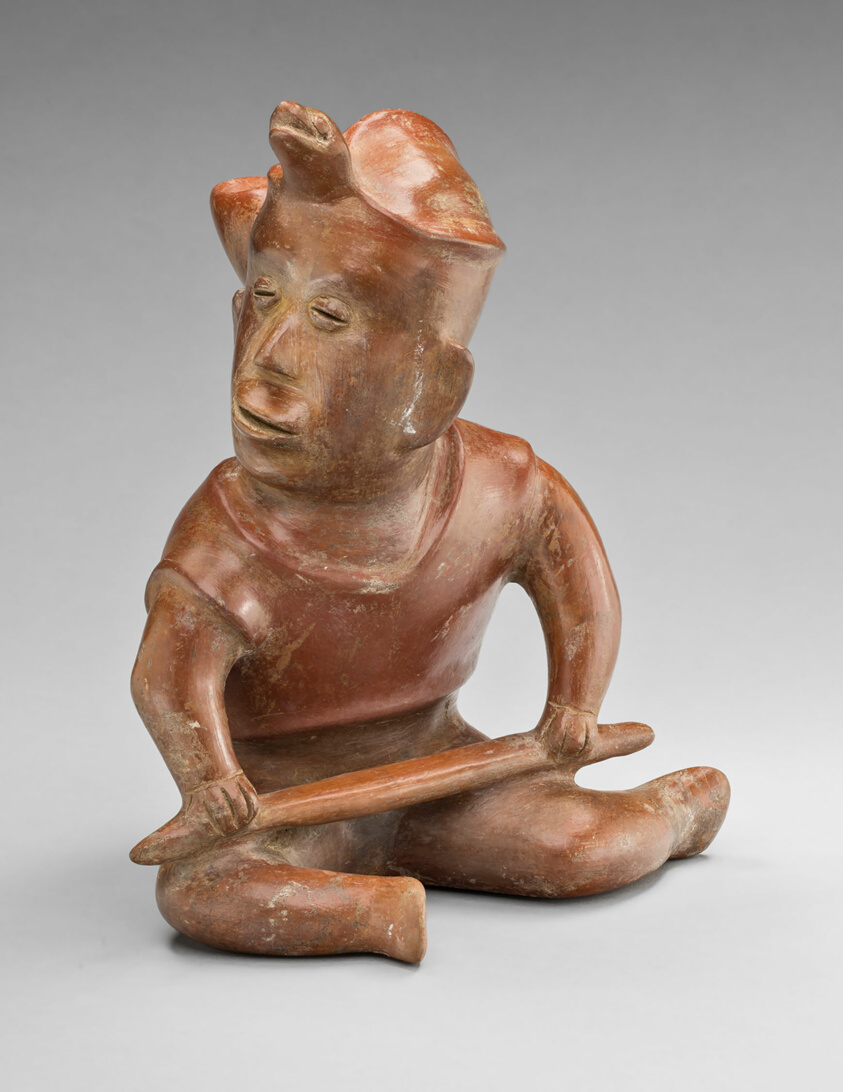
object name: Sculpture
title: Seated Warrior Figure with Turtle Headdress, Holding a Staff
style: colima, mesoamerican, Arts of the Americas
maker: Colima (Colima, Mexico)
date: 100 BCE–250 CE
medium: Ceramic and pigment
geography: Colima state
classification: statuette; art of the americas; sculpture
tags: warriors, warefare, people